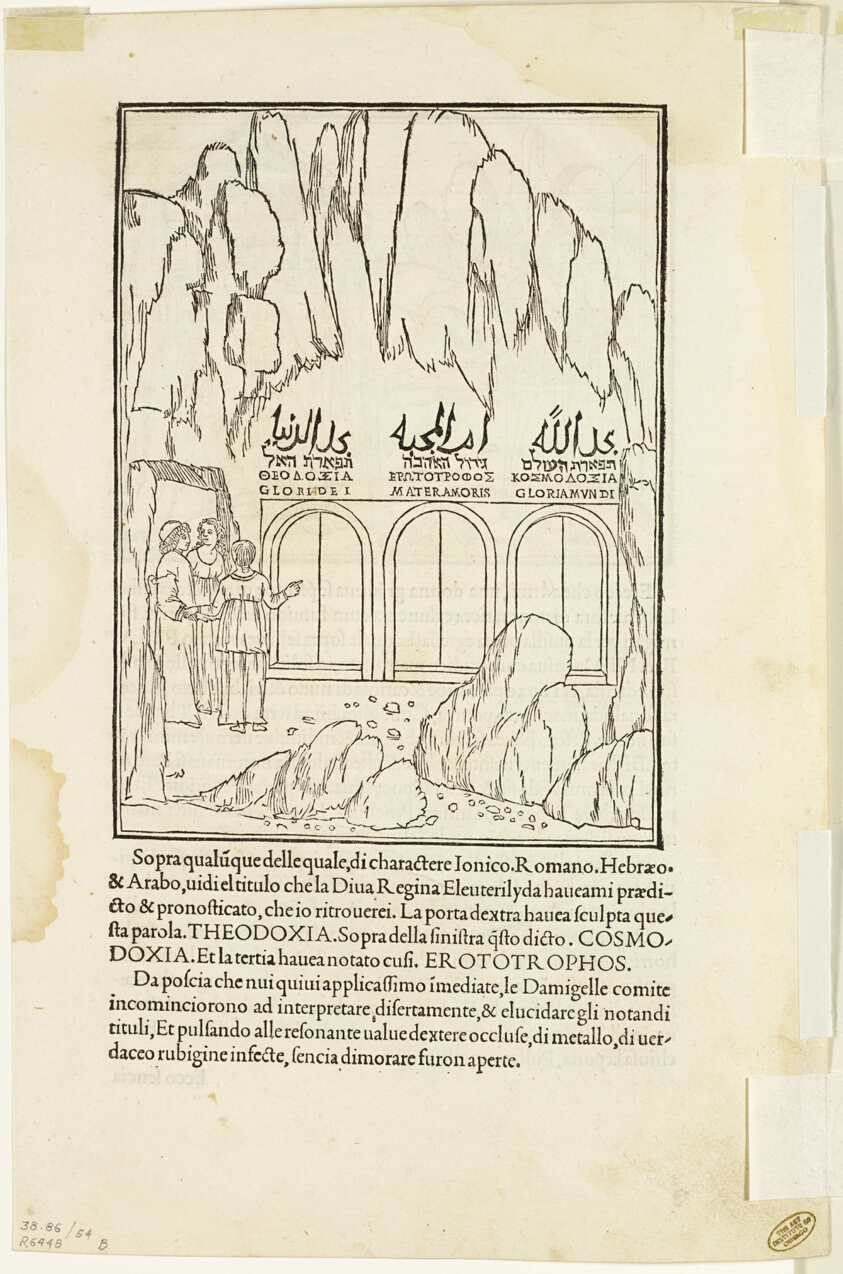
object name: Print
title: Poliphilus Meeting the Venerable Matron (recto) and Poliphilus in a Rocky Place (verso) from Hypnerotomachia Poliphili (The Strife of Love in a Dream) Plate 54 from Woodcuts from Books of the 15th Century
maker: Unknown Artist (Venice, late 15th century); printed by Aldus Manutius (Italian, 1449-1515); commissioned by Leonardo Crasso (Italian, active c. 1499–1509); original text by Francesco Colonna (Italian, 1433/34–1527); portfolio text by Wilhelm Ludwig Schreiber (German, 1855–1932)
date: 1499, portfolio assembled 1929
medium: Woodcut and letterpress in black (recto and verso) on cream laid paper, tipped onto cream wove paper mat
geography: Italy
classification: woodcut; print; prints and drawing